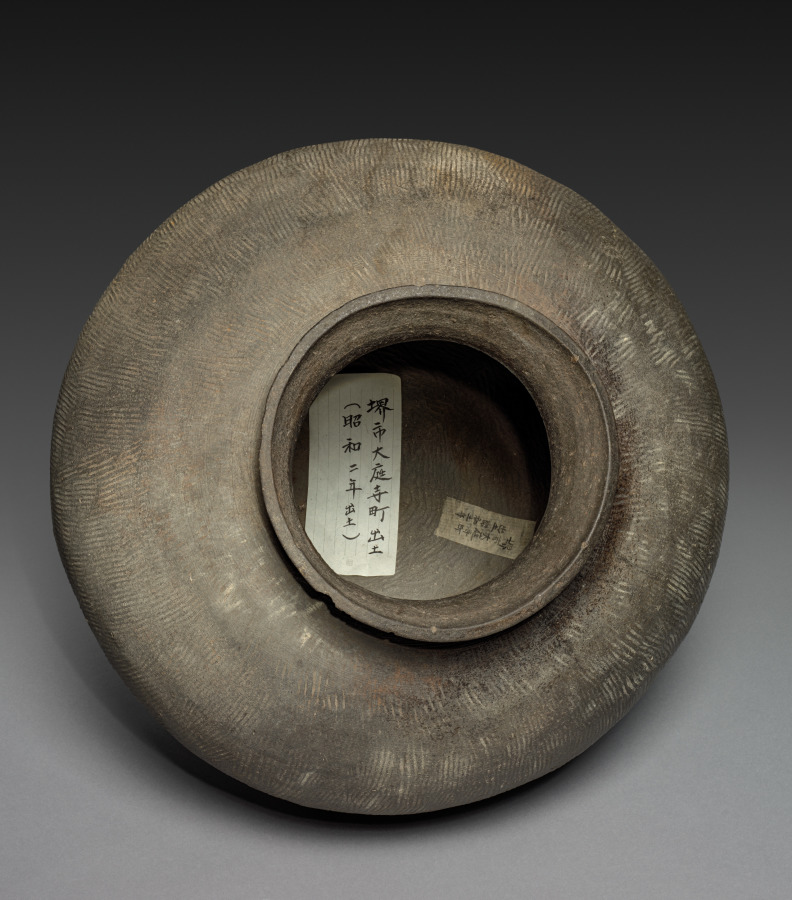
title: Storage Jar: Sueki ware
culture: Japan, Nara period (710–94)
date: 700s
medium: stoneware with incised and impressed decoration and natural ash glaze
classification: Ceramic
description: This robust vessel was formed from clay coils that were beaten inside and out with wooden paddles to compress the body walls and merge the coils. In addition, the exterior surface was paddled and scored with carved wooden tools to decorate the body walls. Finally, the vessel was turned on a potter's wheel to attach the neck with a smoothly finished surface. A high firing (approximately 1000°), which culminated with a reduced oxygen phase, produced the dark gray surface tone. Sueki ware ceramics originated in the mid-400s, when Korean potters and kiln builders established clusters of kilns in the modern Osaka area. Other production centers were established in the outlying provinces by the late 500s, providing for the diffusion of this ceramic ware throughout the country into the 1000s. Sueki wares demonstrate ancient Japan's close cultural ties with the Korean peninsula. Similar vessels have been recovered from sites in the southern regions of the Korean peninsula.